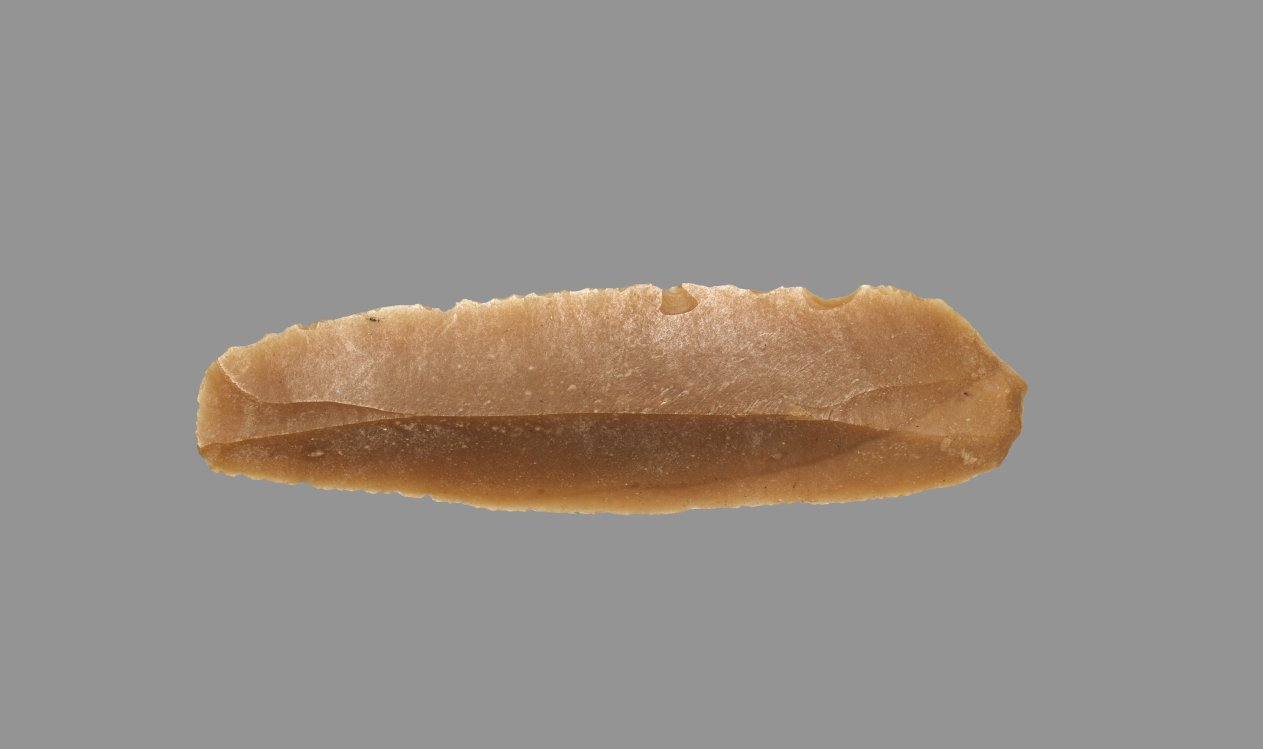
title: Sickle Blade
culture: Egypt, Middle Kingdom (2040–1648 BCE), Dynasty 12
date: 1980–1801 BCE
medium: flint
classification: Implements